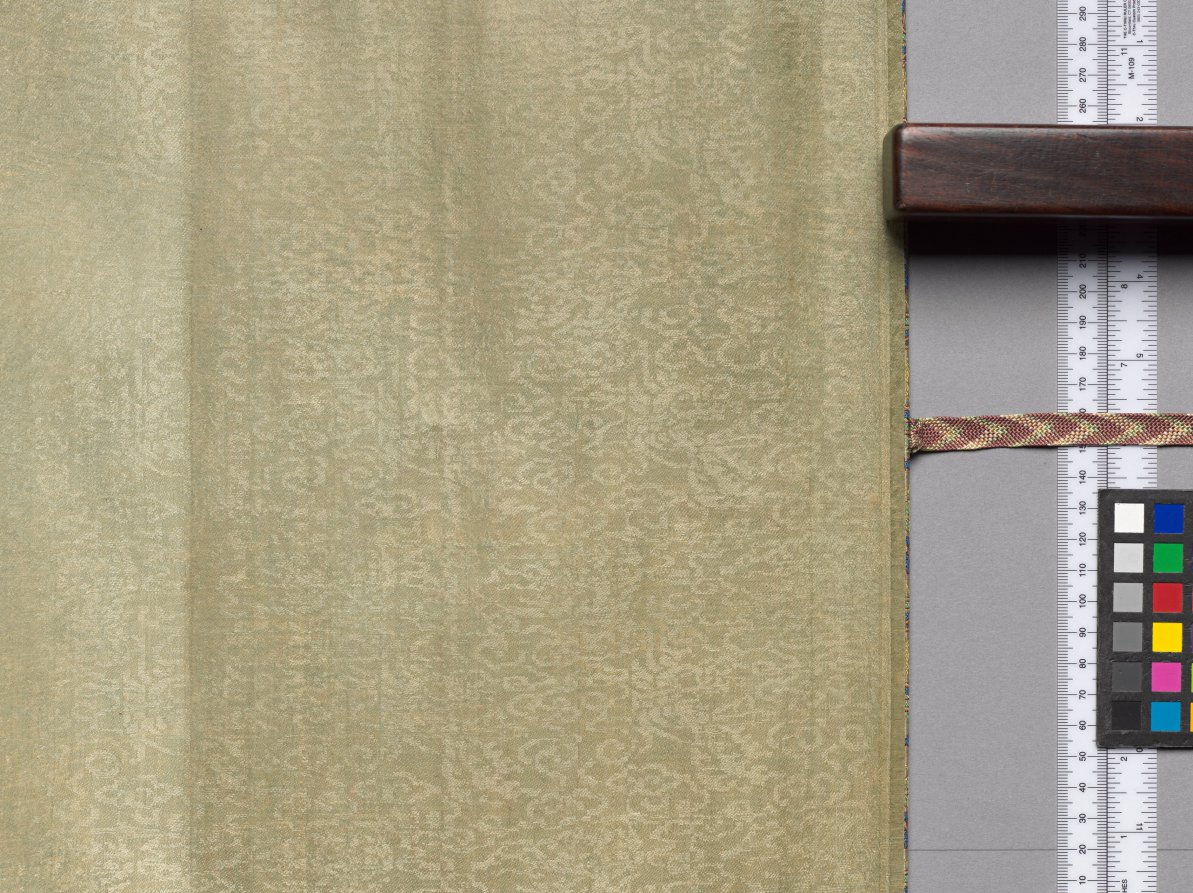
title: Sericulture (The Process of Making Silk)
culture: China, Southern Song dynasty (1127-1279)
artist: attributed to Liang Kai (Chinese, mid-1100s–early 1200s)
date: early 1200s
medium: Handscroll; ink and color on silk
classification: Painting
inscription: 3 colophons and 7 seals of Ch'eng Ch'i (20th c.).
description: By the Southern Song period, the economic center of the silk industry had shifted to the lower Yangzi delta, while the north continued to be troubled by wars. Divided into three sections, the handscroll illustrates 14 steps in the process of making silk, from the raising of silkworms to the weaving of silk cloth. The scroll’s scenes follow the illustrations of Lou Shou’s (1090–1162) Pictures of Tilling and Weaving (gengzhi tu), the first recorded painting of this genre, which was conceived in Hangzhou around 1145. However, in the Cleveland painting the artist groups several scenes of sericulture together under the roof of an open structure.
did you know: The painting is attributed to Liang Kai, a court artist active from about 1201 to 1204 at the Imperial Painting Academy in the city of Hangzhou, a major silk weaving center from that time to the present day.